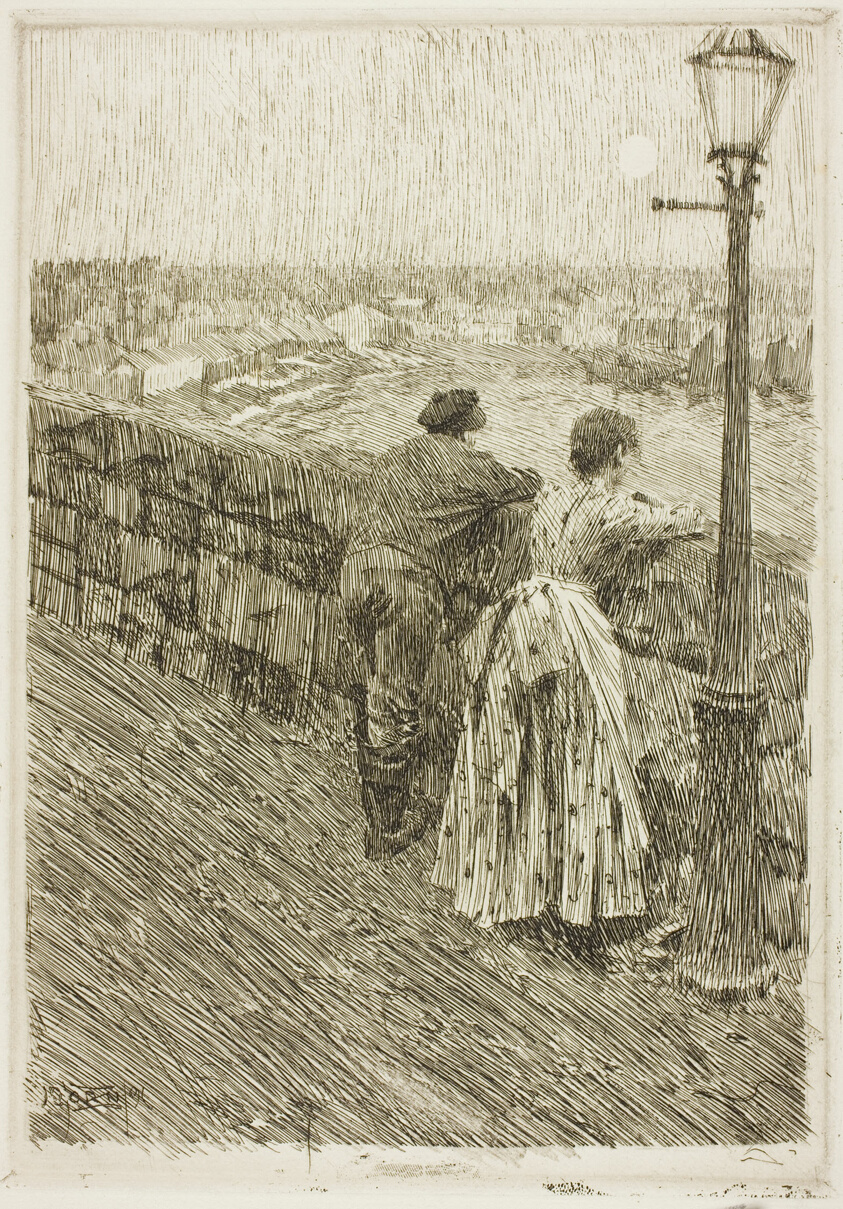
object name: Print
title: Fisherman at Saint Ives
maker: Anders Zorn (Swedish, 1860-1920)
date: 1891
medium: Etching in black ink with burnishing and minor plate tone on ivory laid paper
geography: Sweden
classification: etching; print; prints and drawing